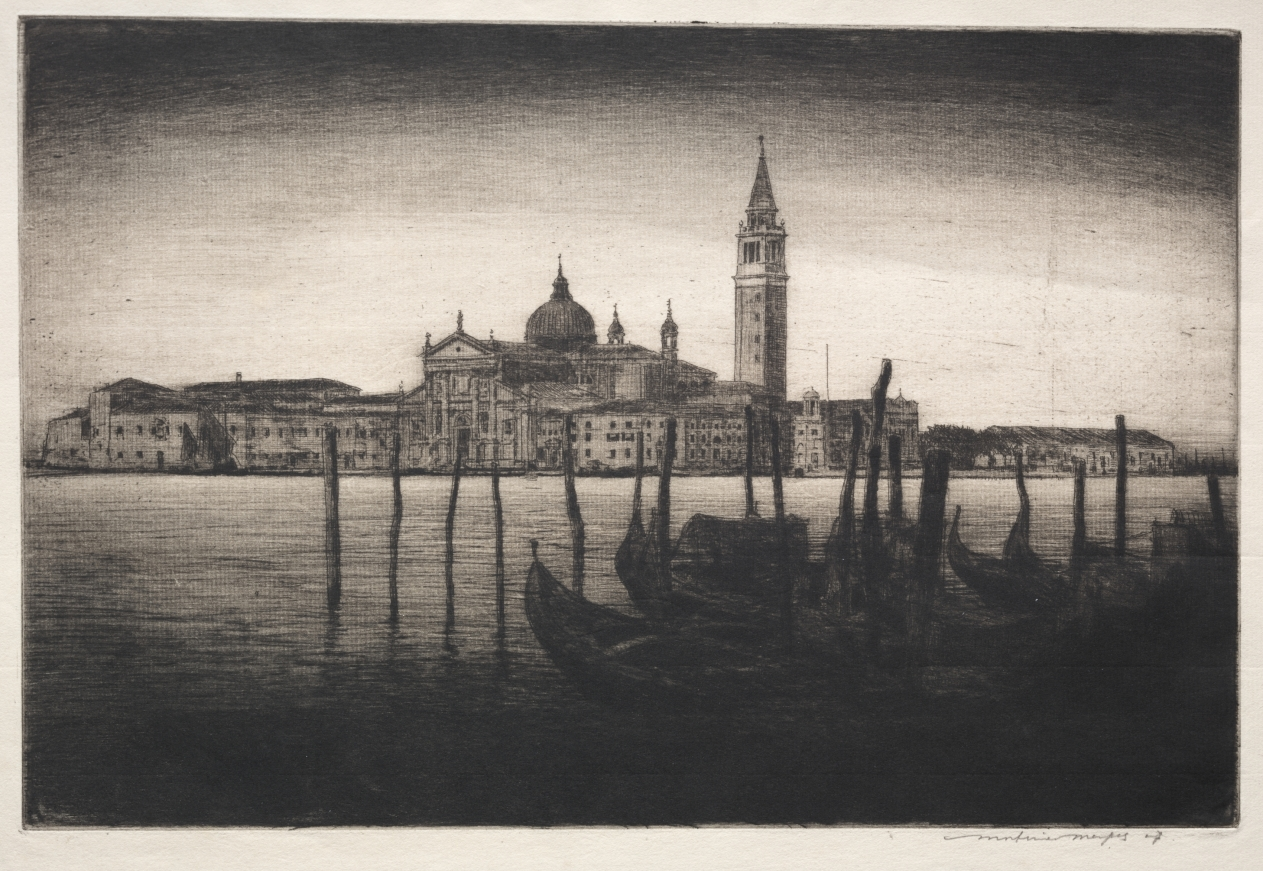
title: San Giorgio Maggiore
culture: England, 19th century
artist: Mortimer Menpes (British, 1860–1938)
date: 1910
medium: etching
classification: Print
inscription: signed, below plate, in graphite; in graphite, lower left: "152"